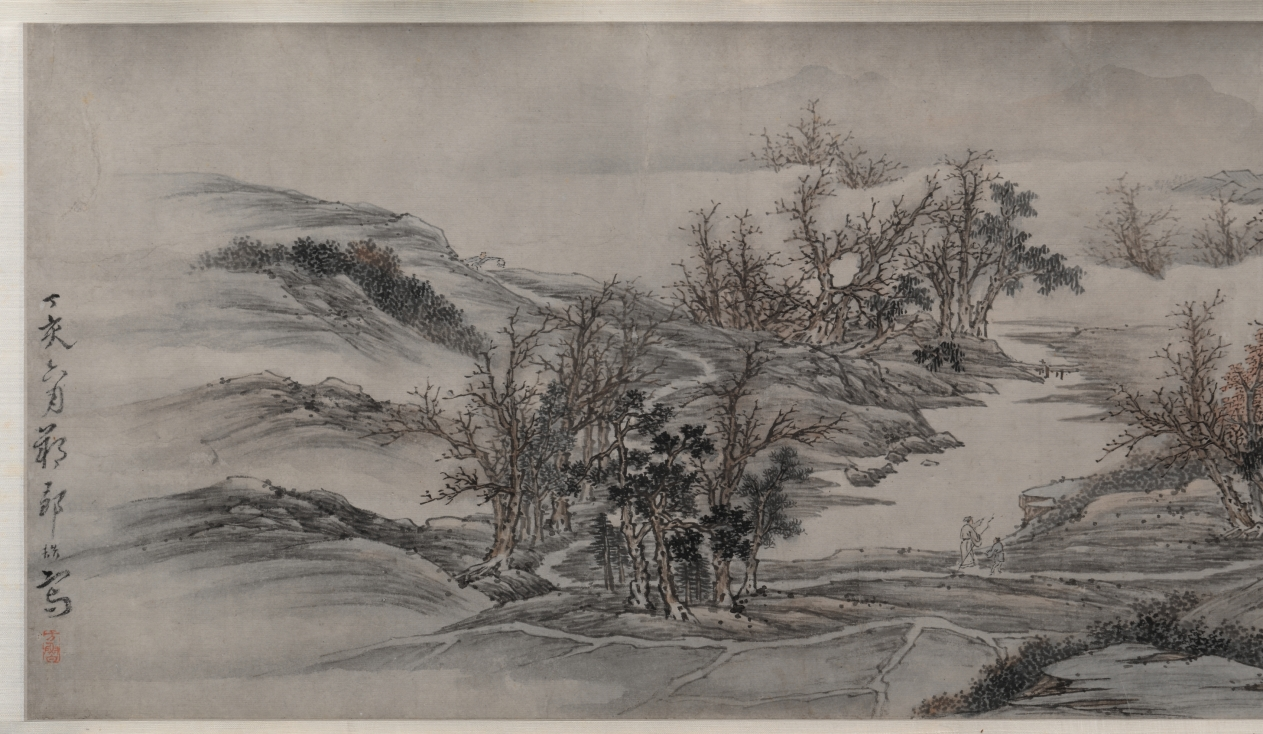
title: Autumn Mist in the Countryside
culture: China, Qing dynasty (1644-1911)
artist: Zou Zhe (Chinese, c. 1610-before 1688)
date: 1647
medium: handscroll, ink and color on paper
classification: Painting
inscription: Artist's inscription, signature, and seal: The first day of the sixth lunar month, the ting-hai year [1647], Tsou Che painted [this]. [seal] Fang-lu.